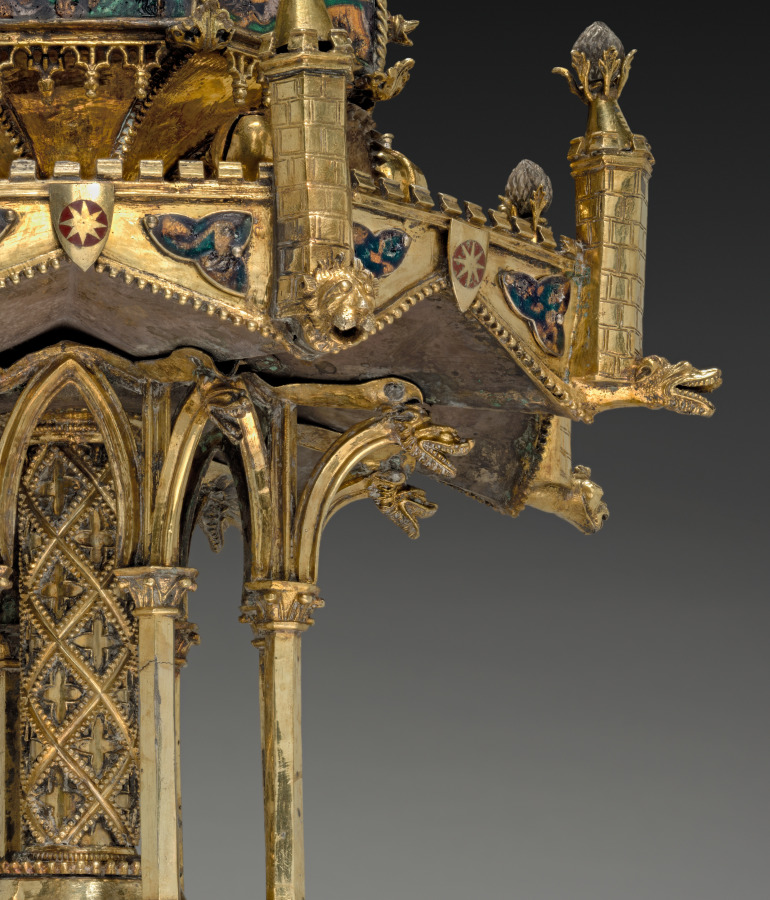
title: Table Fountain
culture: France, Paris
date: c. 1320–40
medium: gilt-silver and translucent enamels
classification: Metalwork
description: Conceptually and stylistically, this object is beyond all else a piece of Gothic architecture in miniature with vaults, pinnacles, columns, and traceried arches. Though the artist who created it is unknown, he was unquestionably inspired by the great Gothic buildings of his time. The table fountain is a three-tiered assembly combining cast elements with bent sheets of gilt-silver. To these have been attached a series of enamel plaques representing grotesque figures, some of which play musical instruments. Water wheels and bells were added to capture motion and sound. The rich detail, precious materials, and involved ornamentation of this deluxe object suggest it would have been expensive to produce and highly treasured by its original owner, someone of high status, and would have been deployed as an object of spectacle. This is the most complete example of its type known to survive from the Middle Ages. Medieval inventories reveal that small fountains like this, often taking various forms, and generally made from precious metals, once existed in large numbers, thus making the Cleveland table fountain an extremely rare object.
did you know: This fountain with its minute architectural details and finely made enamel plaques displayed the wealth and refinement of the owner as it entertained his guests. Imagine hearing the ringing of the tiny bells when this fountain was in use.